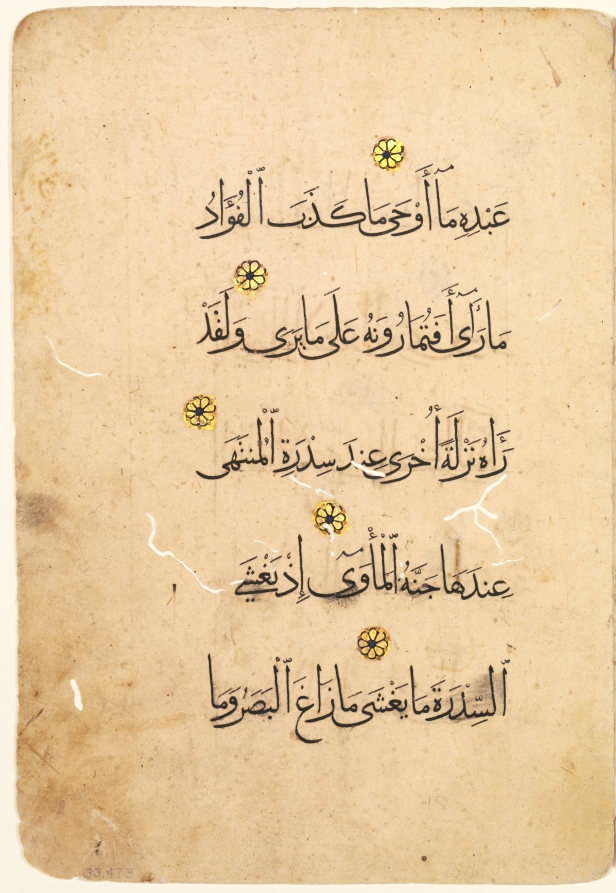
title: Qur'an Manuscript Folio (recto) [Right side of Bifolio]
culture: Egypt, Mamluk sultanate (1250–1517)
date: 1300s–1400s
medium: ink, gold, and colors on paper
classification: Drawing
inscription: Sura al-Najm [Chapter:The Star] 53: part 10-part 17 (Arabic) Muhaqqaq (five lines to a page)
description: It is through the Arabic language that the Qur’an was revealed to the Prophet Muhammad in the 600s. As a result, calligraphy is celebrated as the highest form in Islamic art. The verses (ayat) written here come from the 53rd chapter (surah) of the Qur’an, also known as the Surah An-Najm, the Chapter of the Star. The significance of the Qur’an provides an explanation for the importance of calligraphy, but its use was not restricted to religious texts. Many objects in the museum's Islamic collection bear calligraphic inscriptions and come from secular contexts, displaying the versatility and creativity of this art form.